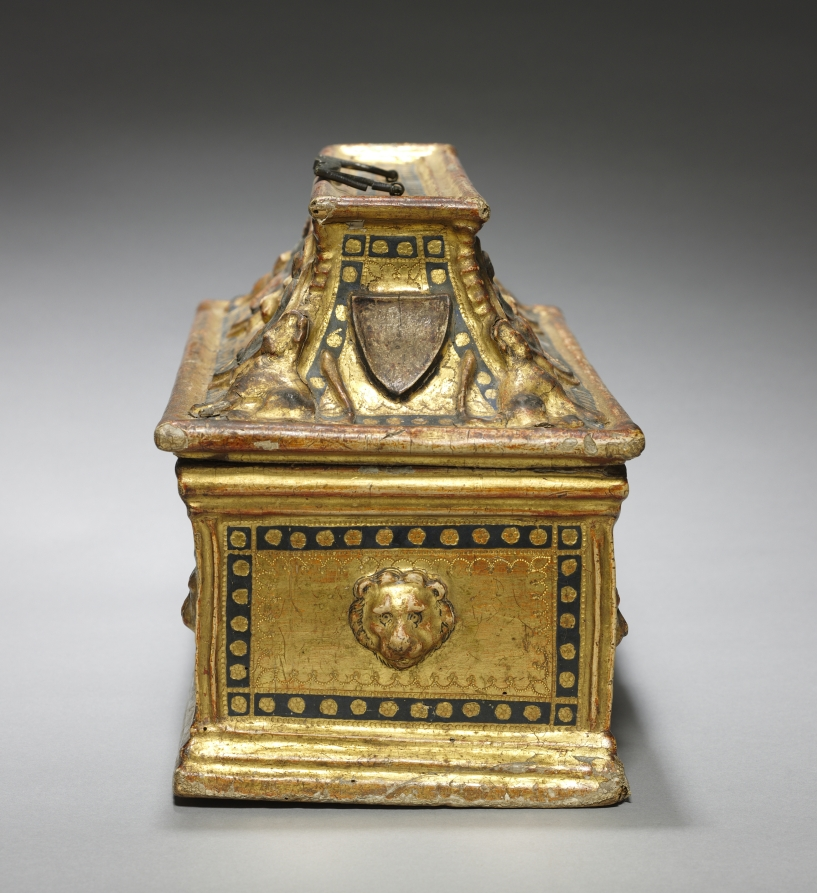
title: Casket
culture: Italy, Siena(?)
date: late 1300s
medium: painted and gilded gesso on wood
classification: Furniture and woodwork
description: This casket is one of only a few of its kind to survive in such a fine state of preservation. A variety of such caskets were used in wealthy homes to store jewelry, seals, mirrors, and combs. A keyhole lock is provided for security. Caskets like this were often highly decorated and given to women as gifts.